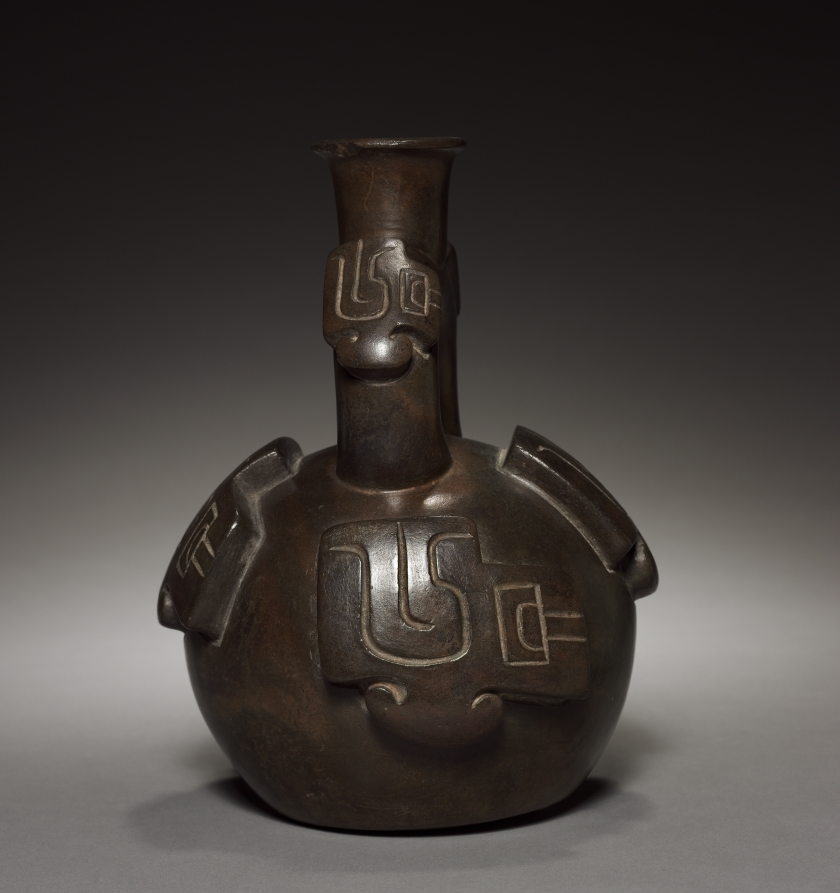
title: Vessel with Stirrup Spout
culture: Peru, likely modern, inspired by the Cupisnique style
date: 1900s (thermoluminescence date)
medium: earthenware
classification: Ceramic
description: The stirrup spout first appeared on the North Coast in the ceramics of the Cupisnique culture, a Chavín contemporary, and remained an important North Coast spout form until the time of the Spanish conquest. It probably had symbolic meaning, now lost.